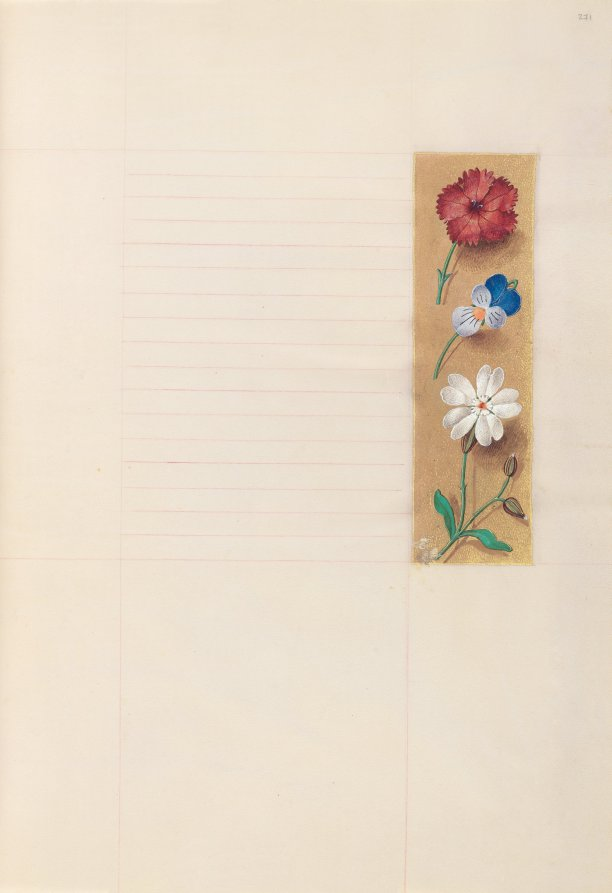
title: Hours of Queen Isabella the Catholic, Queen of Spain: Fol. 271r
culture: Flanders, Ghent and Bruges, late 15th century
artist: Master of the First Prayerbook of Maximillian (Flemish, c. 1444–1519)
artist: and Associates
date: c. 1500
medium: ink, tempera, and gold on vellum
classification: Bound Volume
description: This manuscript was illuminated by a circle of at least five highly organized manuscript painters active in the Flemish cities of Ghent and Bruges. The principal illuminator was Alexander Bening, who painted the majority of the book's miniatures. Manuscripts produced by this circle of artists are renowned for the decoration of their borders, which typically feature a rich variety of realistically-painted flowers, birds, and butterflies. This prayer book, called a book of hours, was intended not for a cleric, but for the private devotions of a lay person-in this case, Isabella the Catholic, Queen of Spain (1451-1504). Isabella's coat of arms embellishes the book's frontispiece. It is unlikely that the book was commissioned by the Queen herself; rather, she probably received it as a diplomatic gift from someone courting her patronage, perhaps Cardinal Francisco Jimenez de Cisneros. A Franciscan friar, Jimenez was dependent upon Isabella for his advancement, first to the post of Queen's confessor in 1492, and then to Archbishop of Toledo in 1495.